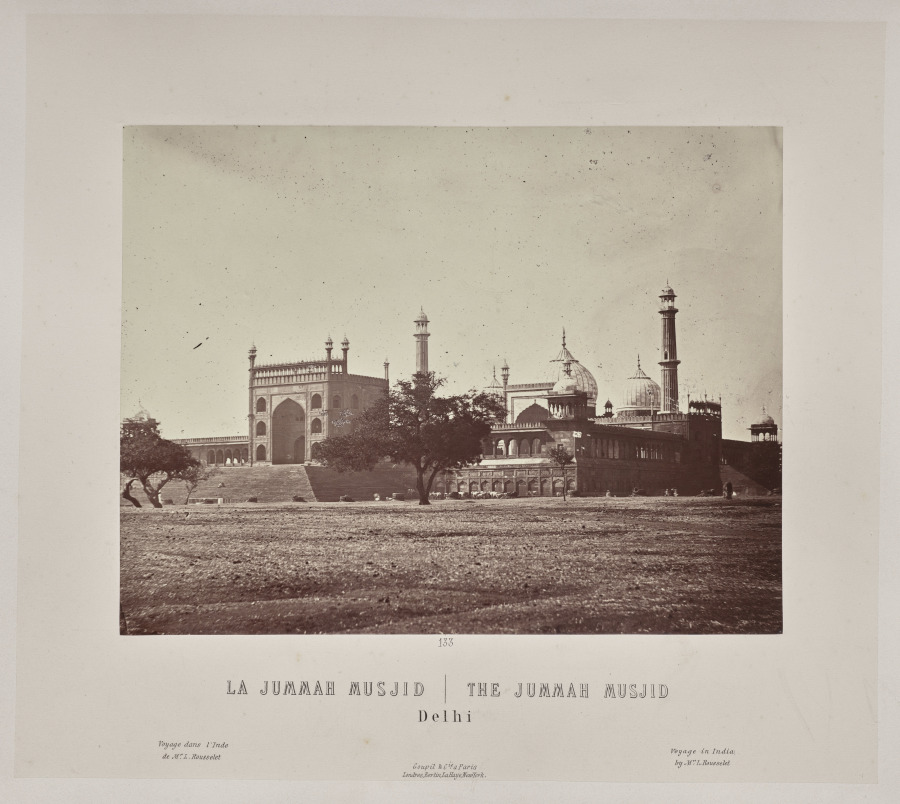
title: The Jummah Musjid, Delhi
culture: France, 19th century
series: India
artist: Louis-Théophile Marie Rousselet (French, 1845–1929)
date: 1865–68, published 1869–70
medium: Albumen print from glass plate negative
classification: Photograph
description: Concerned that his drawings did not do justice to the splendor of India’s monuments, Rousselet learned photography in India that year, a remarkable accomplishment. He proved to be a talented photographer with a sophisticated sense of composition. The scenes in this volume sweep across sites of Sultanate, Rajput, and Mughal power in northern India, from the sacred Hindu city of Varanasi on the Ganges River to Alwar in Rajasthan. Also included are several scenes of industry and portraits of Indian rulers.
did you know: Louis Rousselet described himself as a “scientific traveler” when he went to India alone at age 18 in 1863 and stayed into 1868